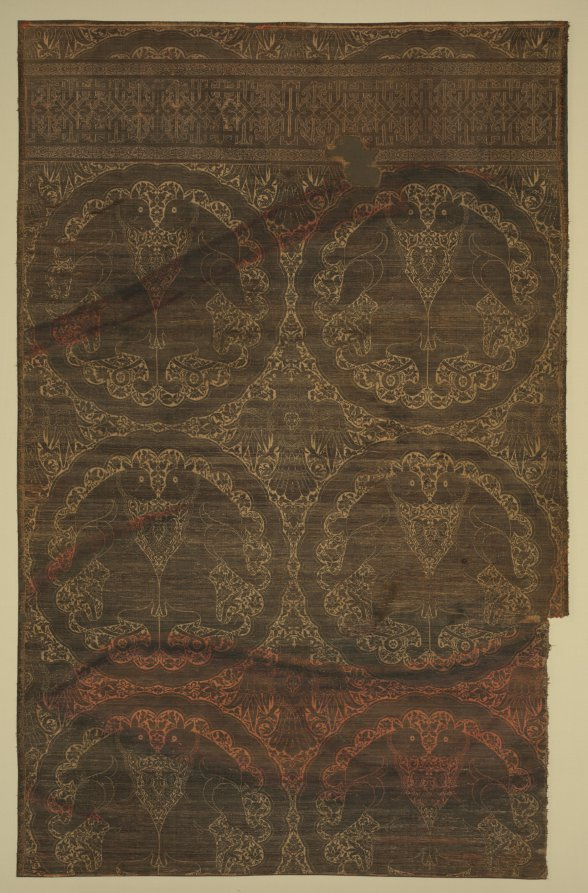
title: Cloth of gold with felines and eagles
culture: Northeast Iran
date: 1225–75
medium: Silk and gold thread: lampas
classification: Textile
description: Mongol taste for luxury was equated with gold, symbol of imperial authority, power, and legitimacy. This splendid cloth of gold-exceptionally large and luxurious-may have enriched the interior of a palace or a majestic tent. The golden pattern, although tarnished on the faded red silk ground, features scalloped medallions with felines whose long tails terminate in dragons’ heads amid elegant floral vines. Double-headed eagles form interstitial motifs on the floral ground. A radiant gold-on-gold band of pseudo-Arabic script enriches the top, woven with gold strips wrapped around a silk core on a ground of flat strips of gold, immediately beneath the pattern testing area.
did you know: Mongol cloths of gold, called nasji, incorporate Iranian, Central Asian, and Chinese features, reflecting the effects of gift exchanges and international commerce.